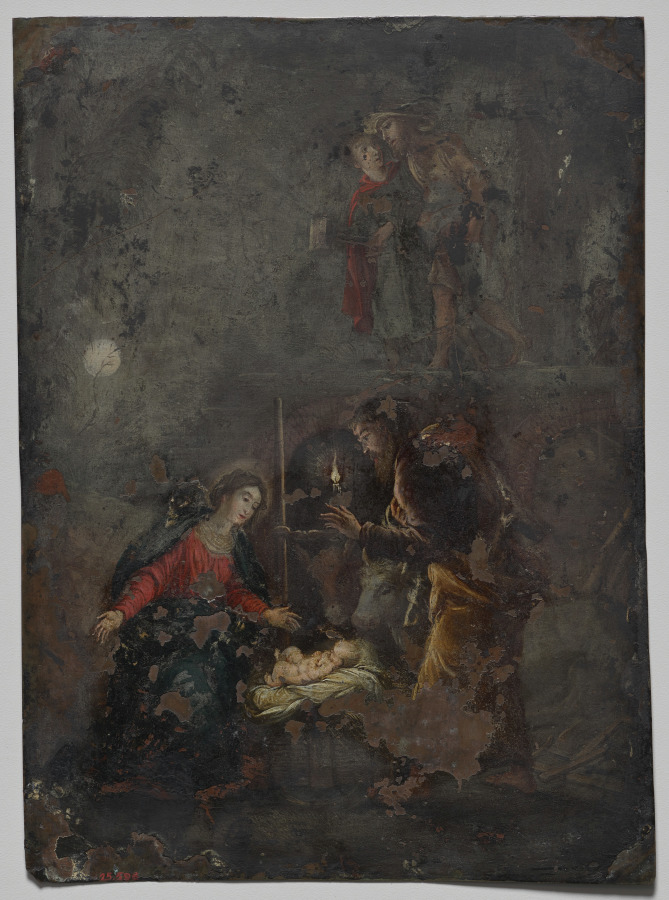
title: Gluttony (Land of Cockaigne)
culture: Flanders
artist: Peeter Baltens (Flemish, 1526/28–before 1584)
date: 1560s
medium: engraved copper plate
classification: Plate